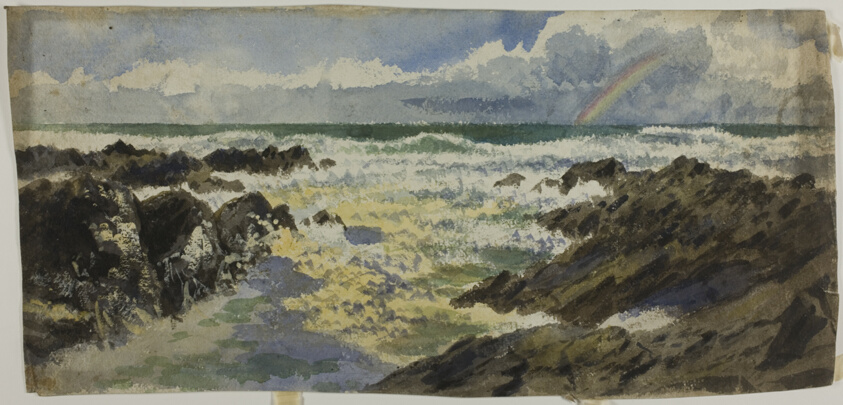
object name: Drawing and Watercolor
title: Rainbow Over Stormy Sea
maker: Unknown Artist; American or English, 19th century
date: c. 1900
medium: Watercolor over traces of graphite on ivory wove paper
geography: United States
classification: watercolor; drawings (visual works); prints and drawing